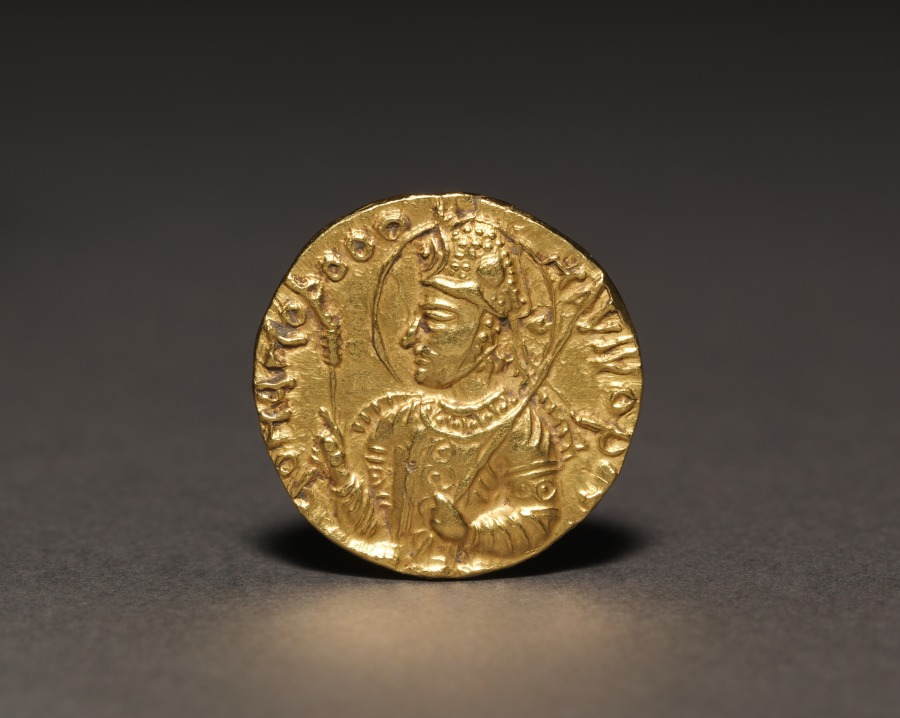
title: Coin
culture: India, Mathura, Kushan period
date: c. 106–149 CE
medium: gold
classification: Coins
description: This gold coin represents the reign of the Kushana ruler, Havishka. The coin bears a portrait of the ruler on the obverse and various deities on the reverse. It is identified by inscriptions in Kharosthi, the language used in northwestern India during the Kushan period.